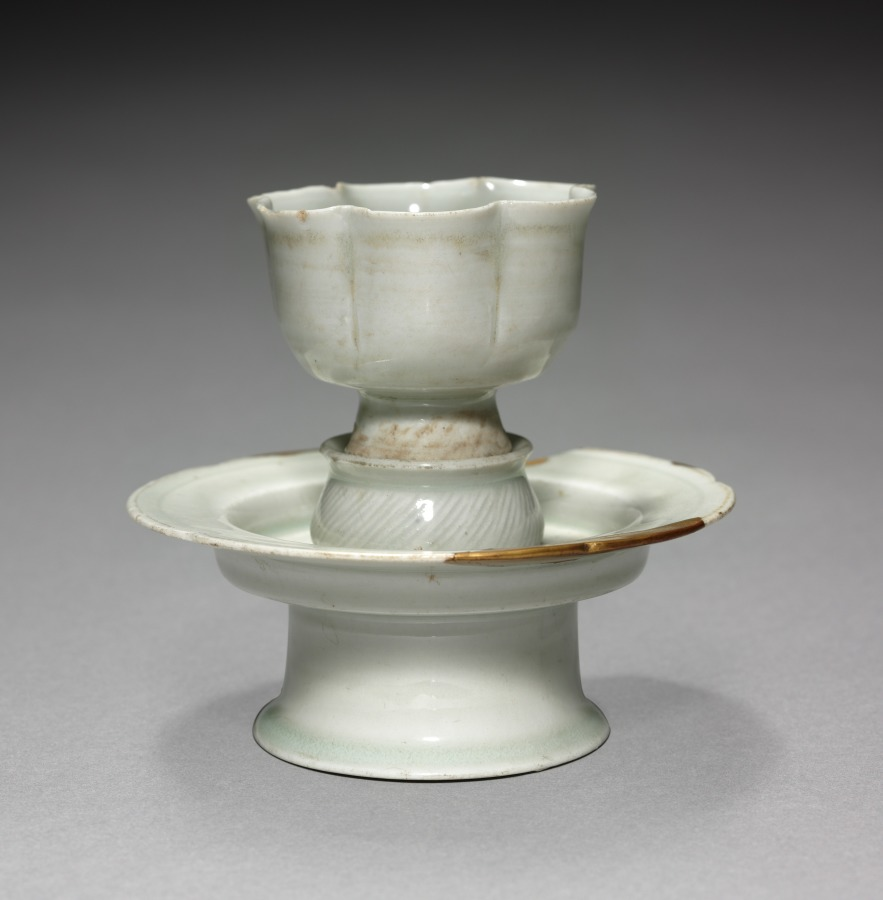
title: Cup and Stand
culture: Korea, Goryeo dynasty (918–1392)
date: 900s-1100s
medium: pottery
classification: Ceramic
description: As early as the seventh century, the practice of drinking tea and wine became an important part of elite culture in Korea. Elites of the Goryeo period commissioned a variety of types of utensils and vessels including this delicate-looking cup and cup stand, not only to make their drinking experience more exciting, but also to show their refined taste.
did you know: Many types of sophisticated stoneware examples such as this cup and cup stand were buried in the tombs of ruling class of the Goryeo dynasty (918–1392).